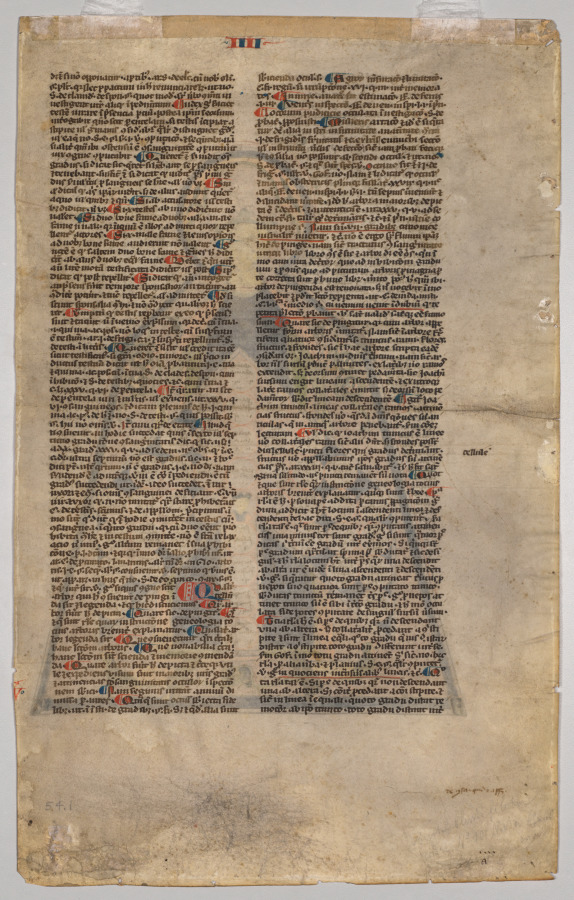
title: Leaf Excised from Henry of Segusio's "Summa Aurea": Table of Consanguinity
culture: France, Paris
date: c. 1280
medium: ink, tempera, and gold on parchment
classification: Manuscript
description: Henry of Segusio, a professor of law at the universities of Bologna and Paris, died at Lyon in 1271. His Summa Aurea (Golden Summary) was an early treatise on canon law (church law) that was so important that it was repeatedly copied after his death. This leaf comes from one such early copy.